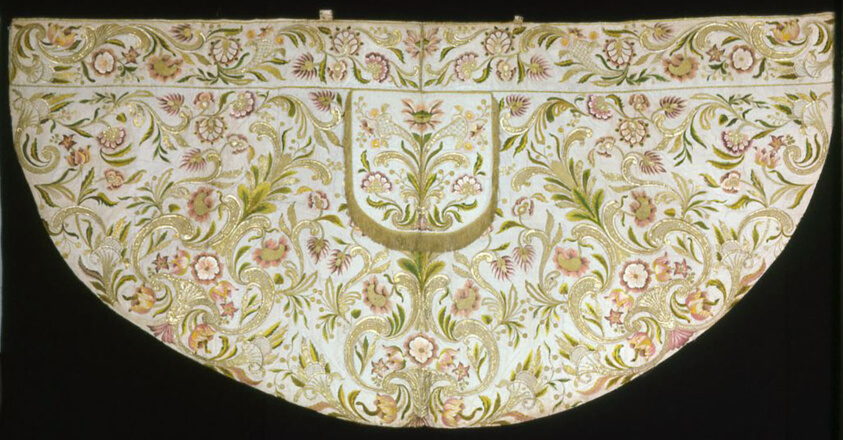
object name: Textile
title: Cope with Orphrey Band, Hood and Remnants of a Morse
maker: Italy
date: 1775/1800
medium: Silk, plain weave; underlaid with linen, plain weave and embroidered with silk floss, gold gilt strips, and paillettes in satin stitch; laid work, couching, and padded couching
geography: Italy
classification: textile; weaving; liturgical; needlework (visual works)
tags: flowers